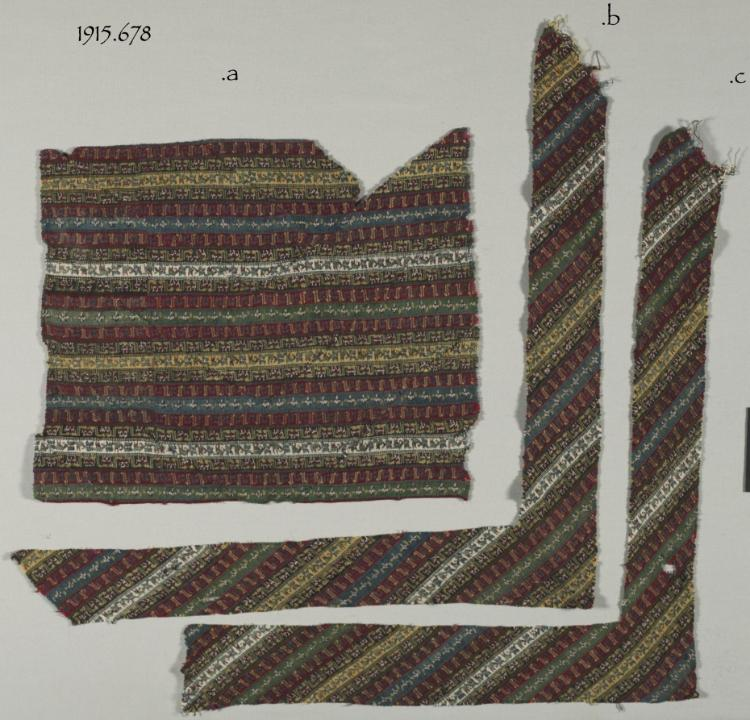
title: Fragment of a Border of a Shawl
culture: India, Kashmir, 19th century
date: 19th century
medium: twill weave, brocaded; wool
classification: Textile